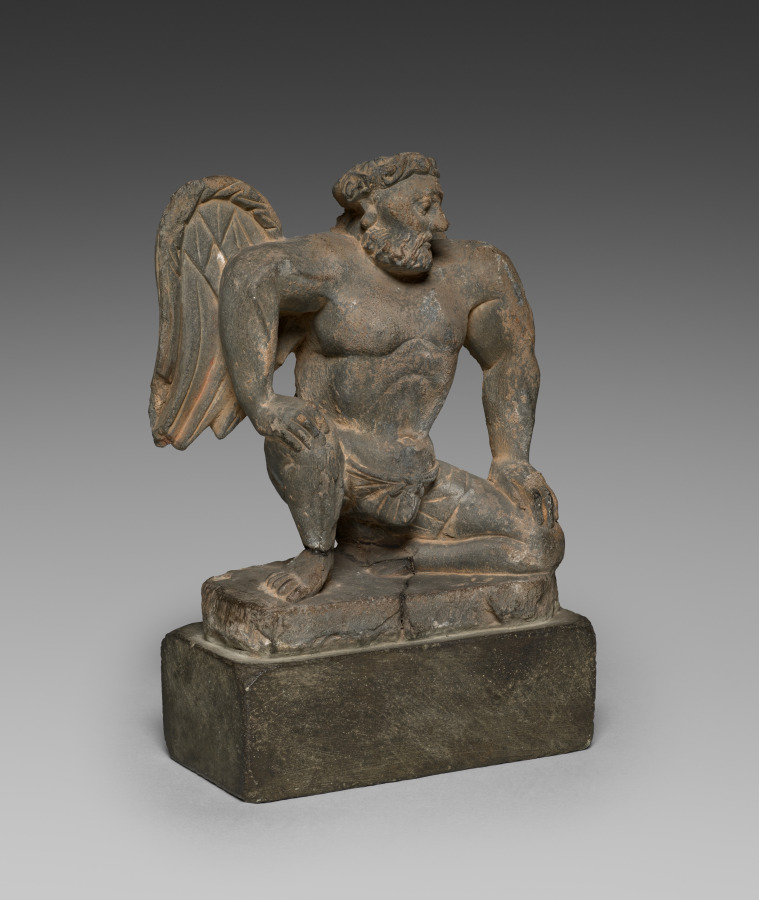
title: Winged Atlas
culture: Pakistan, Gandhara, Kushan period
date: c. 100s–200s CE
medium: gray schist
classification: Sculpture